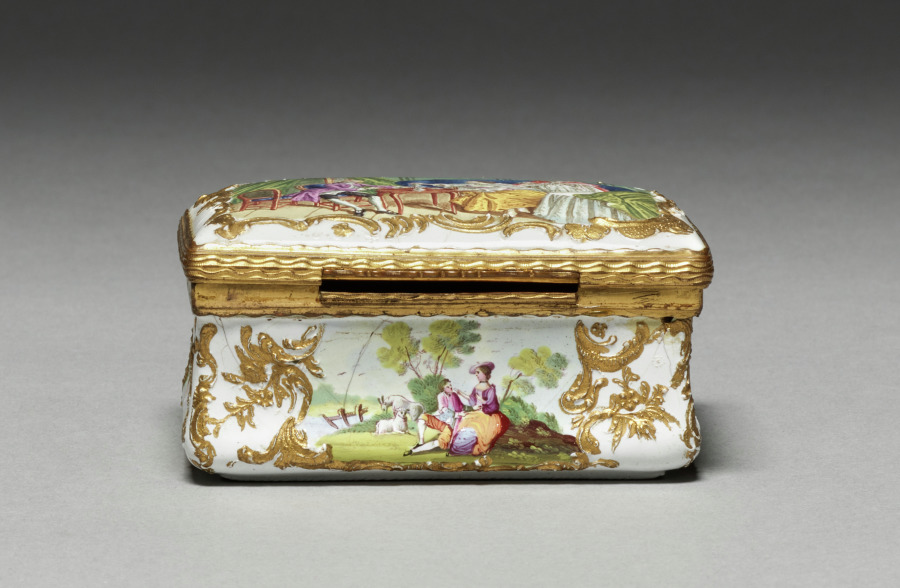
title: Box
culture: England, 18th century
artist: South Staffordshire Factory (British)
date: 1760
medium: enamel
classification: Enamel